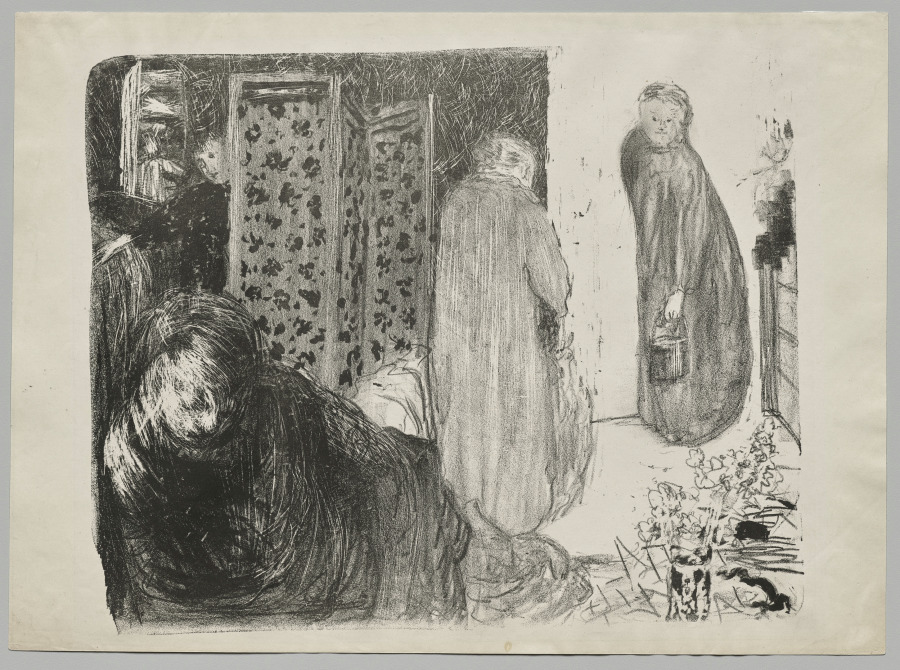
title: Interior with a Screen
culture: France, late 19th - 20th century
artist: Édouard Vuillard (French, 1868–1940)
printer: Edward Ancourt (French, 1841–1898?)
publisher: Ambroise Vollard (French, 1867–1939)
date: c. 1893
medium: lithograph on buff wove paper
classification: Print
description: During the 1890s, when Édouard Vuillard made this print, his work focused on intimate domestic scenes. Here, the artist depicted the apartment that he shared with his mother and sister, who worked as seamstresses from home. Although the women are seen going about their daily activities, Vuillard used patterning and scale to suggest a subtle sense of unease and make the everyday seem unfamiliar.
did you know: This print is one of several published by the prestigious art dealer Ambroise Vollard, who became a supporter of Édouard Vuillard's work during the 1890s.